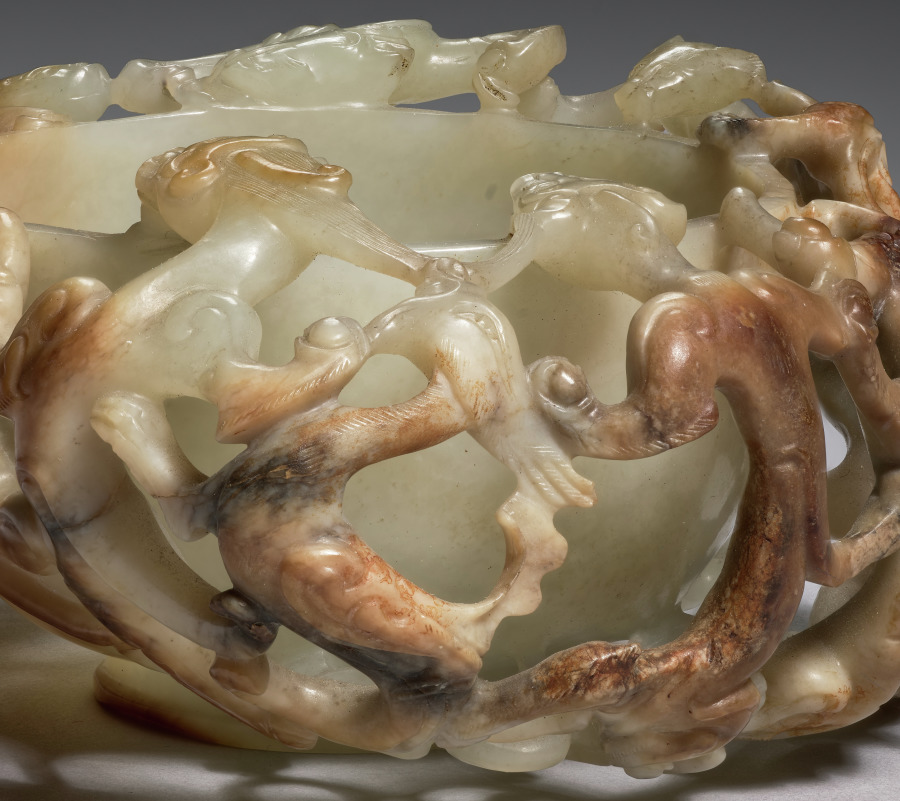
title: Cup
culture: China, Qing dynasty (1644–1911), Qianlong reign (1736–95)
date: 1736–95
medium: jade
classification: Jade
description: In the Qing dynasty, luxury items became more affordable to larger parts of the society, including women, merchants, and literati in nonofficial positions. Imperial patronage and a growing urban population also encouraged consumption of luxury goods and local craftmanship. This cup with open-work interlacing dragons shows the creative mind of the skilled artisan who carved it from a round piece of jade.